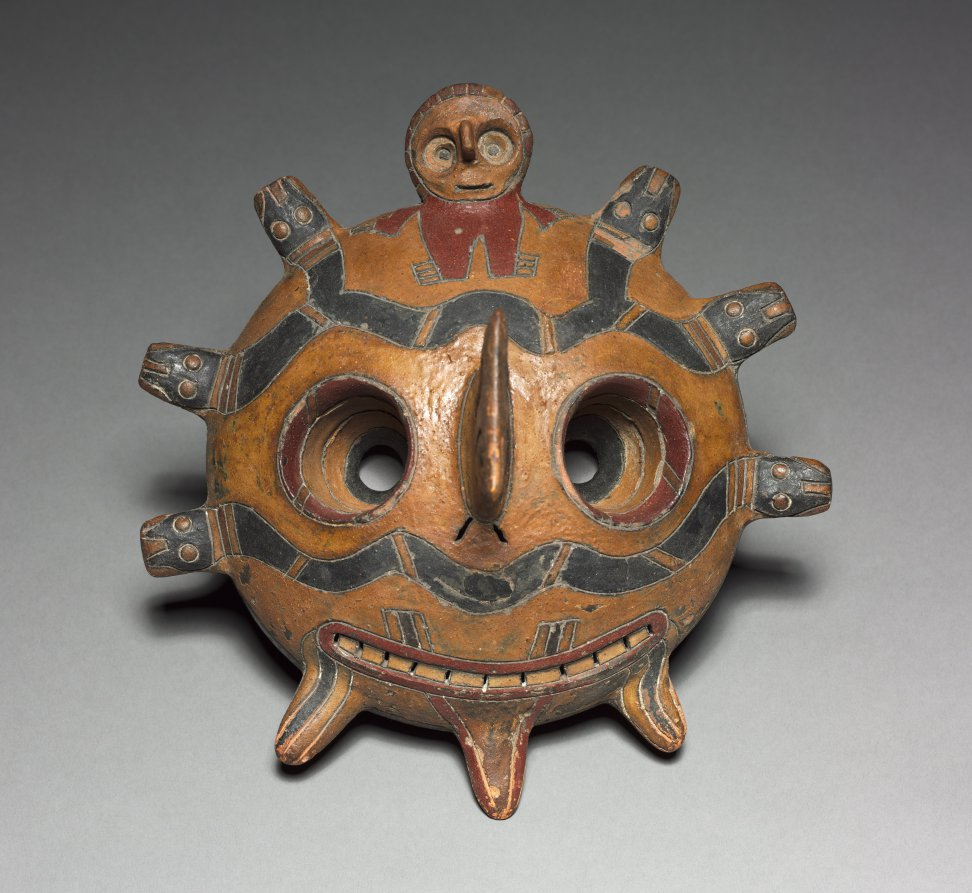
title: Oculate Being Mask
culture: Peru, South Coast, Paracas (Cavernas) style (700 BCE–1 CE)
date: 300 BCE–1 CE (thermoluminescence date, 835 BC–185 CE)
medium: ceramic, resin-based paint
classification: Ceramic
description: This rare mask incarnates a supernatural being who may have been the patron of an early fertility cult on Peru’s south coast. Its traits insinuate power, especially the stuck-out tongue and the serpents that slither over the face to form a halo-like corona. Unexplained are the shape of the nose and the small figure wearing a similar mask. The mask could have served as the face of a mummy bundle or an object; the projecting eyes might rule out use by a living performer.